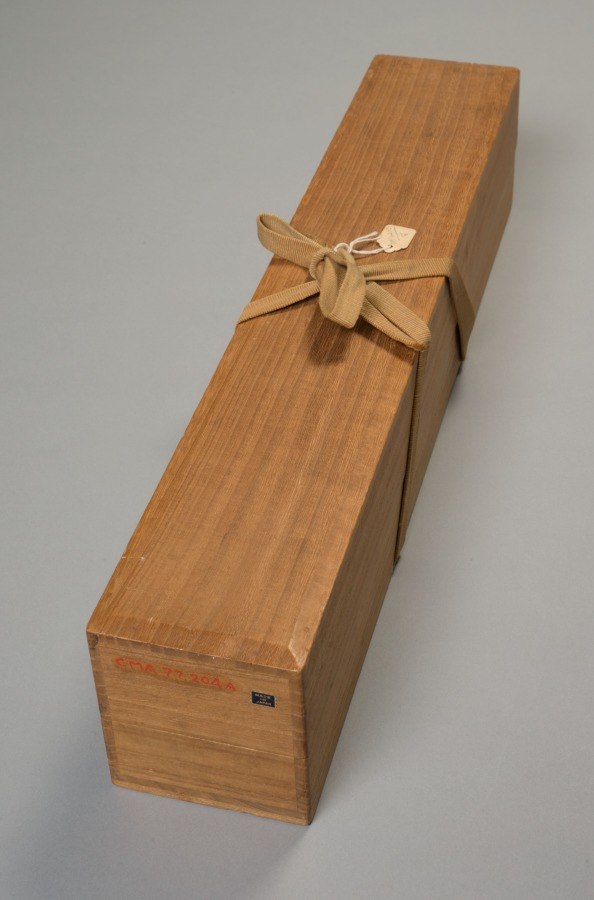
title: Seated Priest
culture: Japan, Momoyama period (1573-1615) to Edo period (1615-1858)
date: late 1500s-1650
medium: hanging scroll; ink on paper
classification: Painting